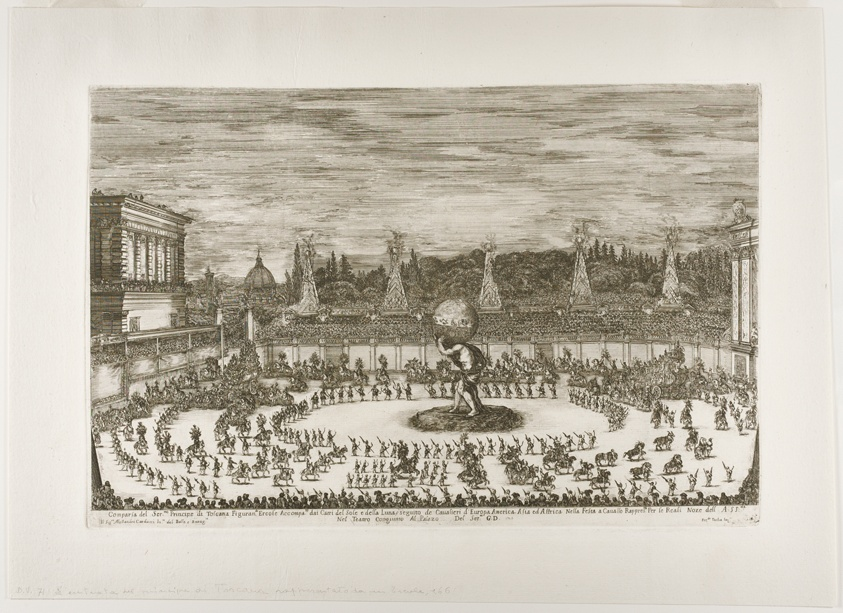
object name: Print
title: Equestrian Ballet in the Amphitheater of the Boboli Gardens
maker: Stefano della Bella (Italian, 1610-1664)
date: 1661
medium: Etching on ivory laid paper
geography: Italy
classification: etching; print; prints and drawing